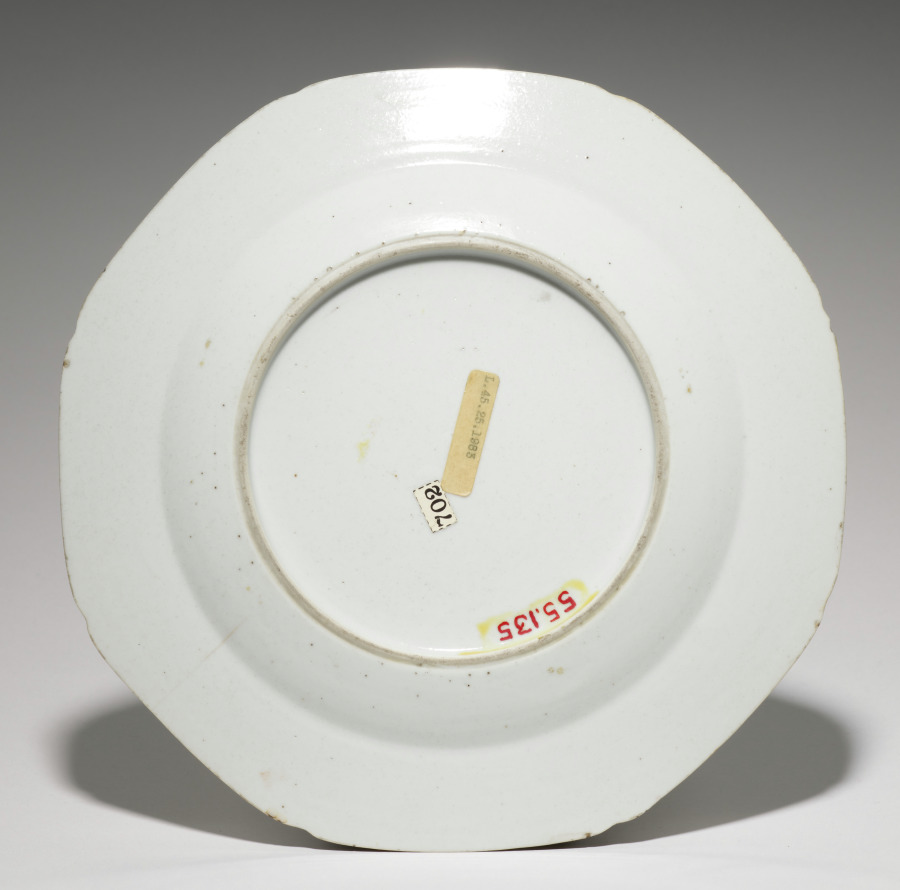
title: Plate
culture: China, Chinese Export, early 19th century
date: c. 1800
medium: porcelain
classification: Ceramic